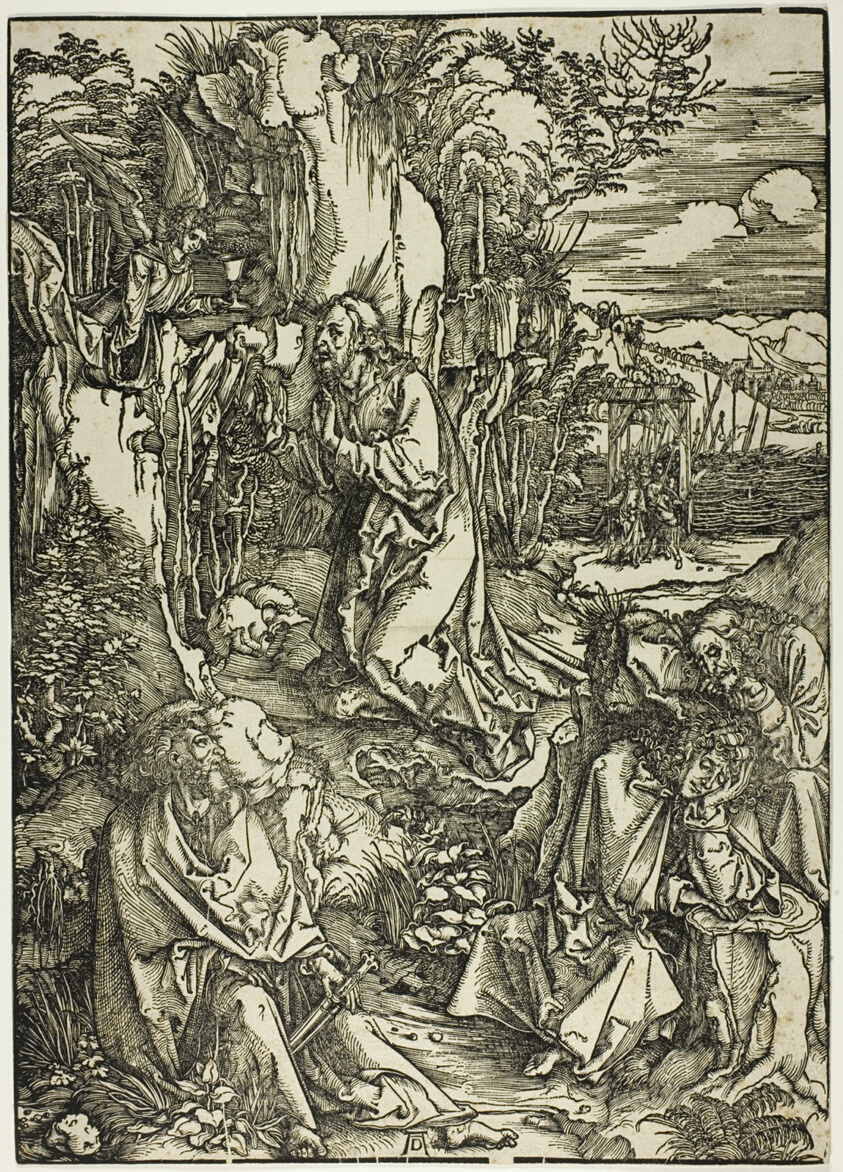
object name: Print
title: Agony in the Garden, from The Large Passion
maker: Albrecht Dürer (German, 1471-1528)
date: c. 1496–97, printed c. 1675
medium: Woodcut in black on ivory laid paper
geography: Germany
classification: woodcut; print; prints and drawing; paper